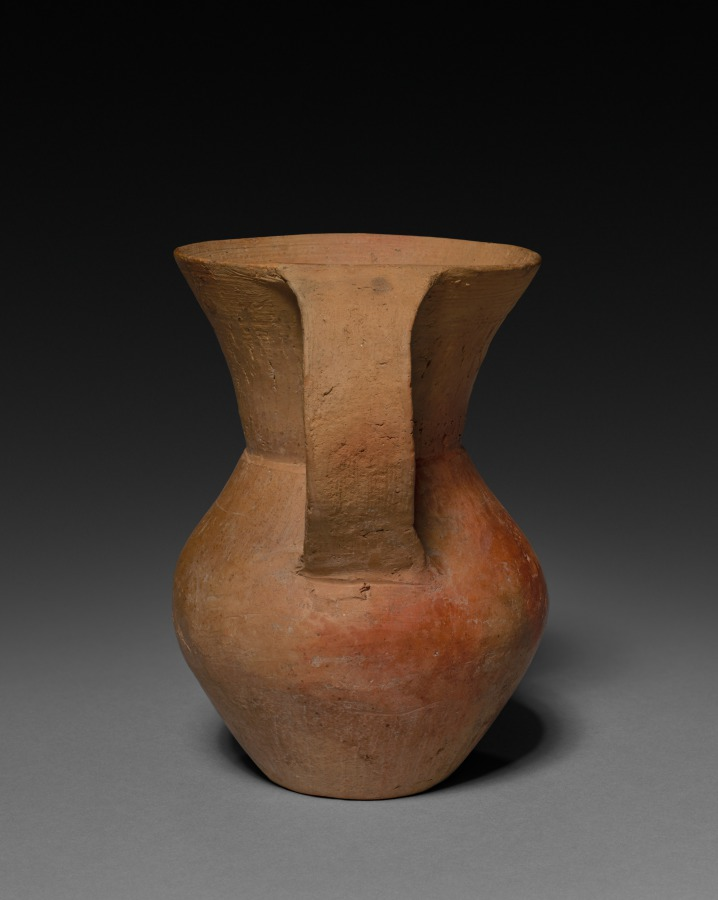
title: Double-Handled Beaker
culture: China, type-site at Qijiaping, Gansu province, Neolithic period, Qijia Culture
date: c. 2000–1500 BCE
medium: burnished earthenware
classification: Ceramic